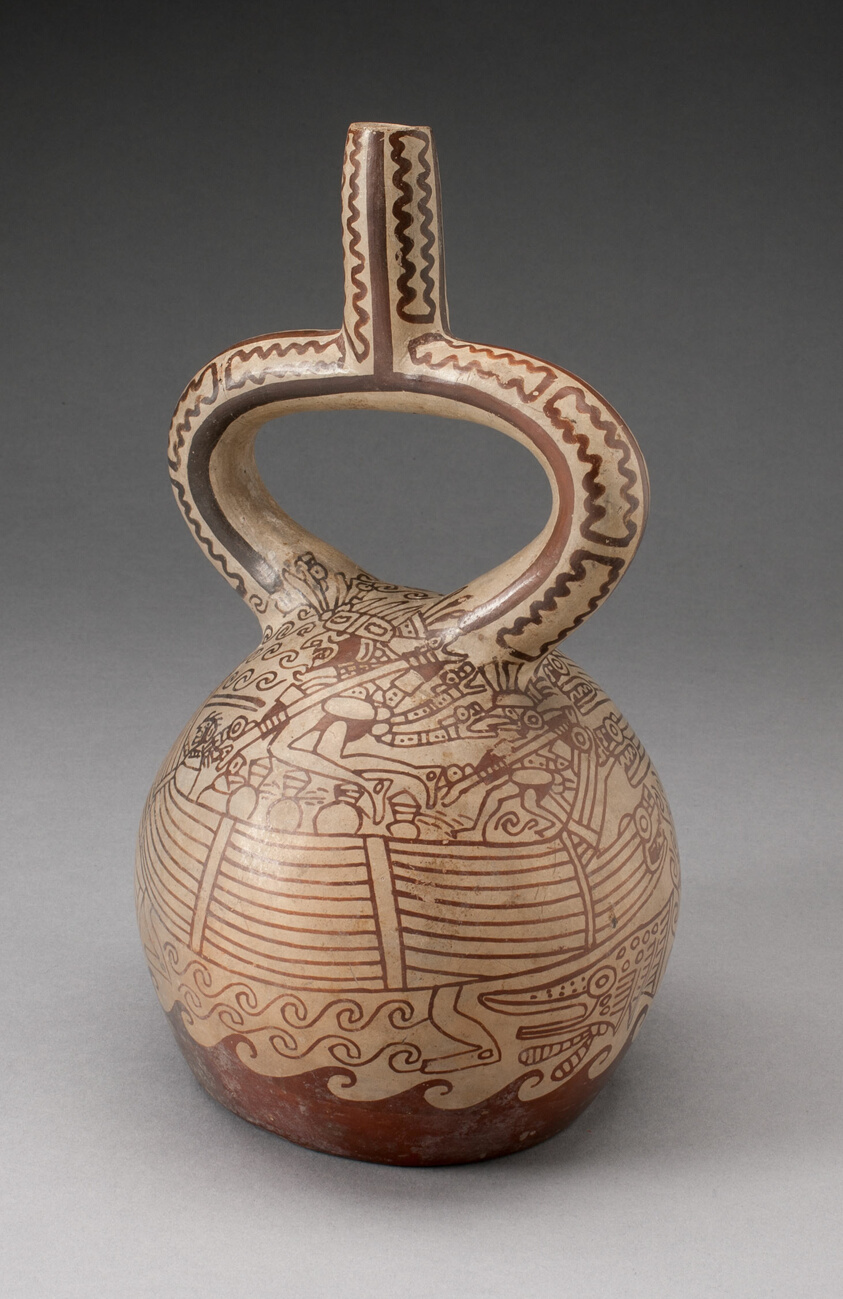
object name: Vessel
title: Stirrup Vessel with Fineline Painting Depicting a Figures in Reed Boat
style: moche, mochica v, mochica, early intermediate period, Pre-Columbian, americas, Arts of the Americas, andean, andes, south american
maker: Moche (North coast, Peru)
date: 100 BCE–500 CE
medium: Ceramic and pigment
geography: Peru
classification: earthenware; ceramics; vessel; art of the americas